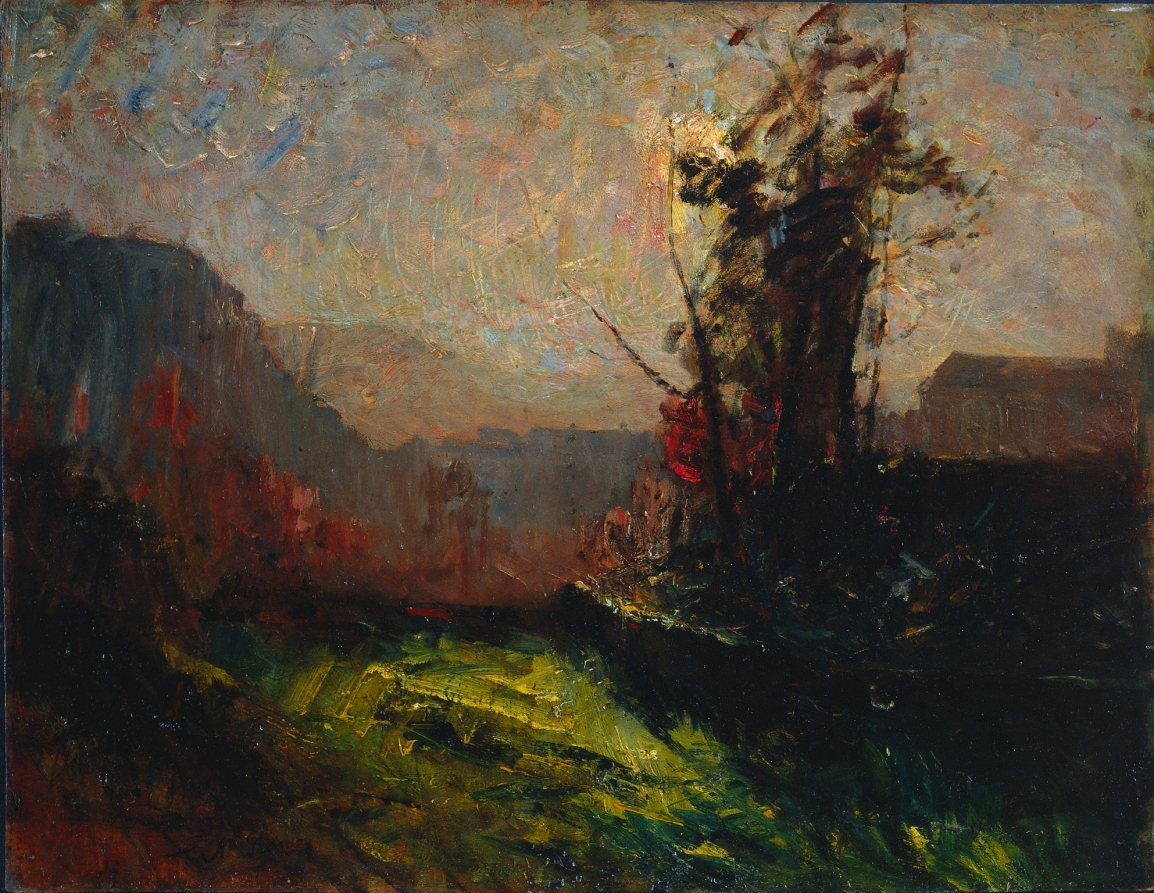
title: Crémieu, Seen from Chaillonnette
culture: France, 19th century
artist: François-Auguste Ravier (French, 1814–1895)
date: c. 1867–1872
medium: oil on wood panel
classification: Painting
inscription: Signed lower left in black, probably a stamp: Ate Ravier